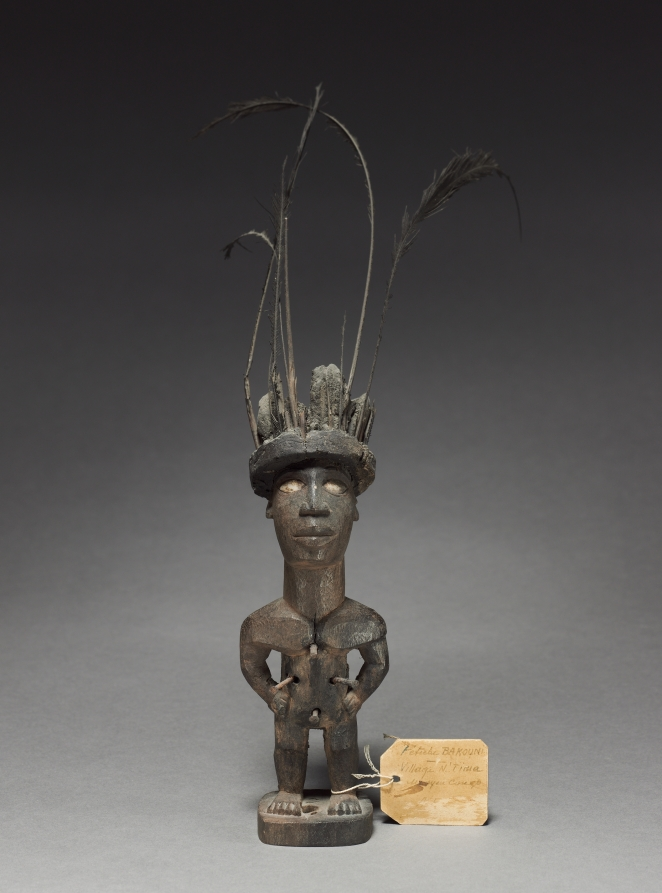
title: Power figure (nkisi)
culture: Africa, Central Africa, Republic of the Congo, Kongo-style maker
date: late 1800s–early 1900s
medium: Wood, feathers, organic material (including resin), iron, and possibly porcelain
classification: Sculpture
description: This figure had lost its nkisi load on the belly, but now shows how the mixture of earth, resin, leaves, glass, and other items was fixed onto the wooden figure, supported by four nails. It had been the property of “the sorcerer of Mboukou.”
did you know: This niksi figurine shows how the mixture of earth, resin, leaves, glass, and other items was fixed. It had been the property of “the sorcerer of Mboukou.”